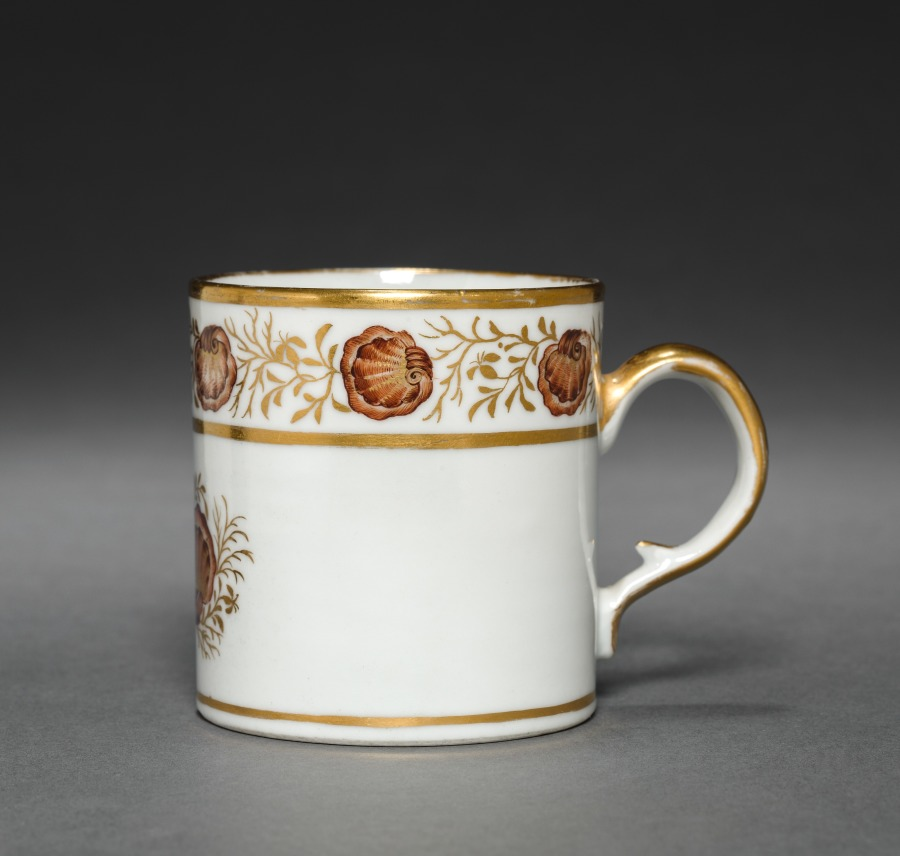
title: Cup from Oliver Wolcott, Jr. Tea Service (4 of 6)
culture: Chinese Export porcelain, late 18th-early 19th century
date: 1785–1805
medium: porcelain, sepia enamel, gold leaf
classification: Ceramic